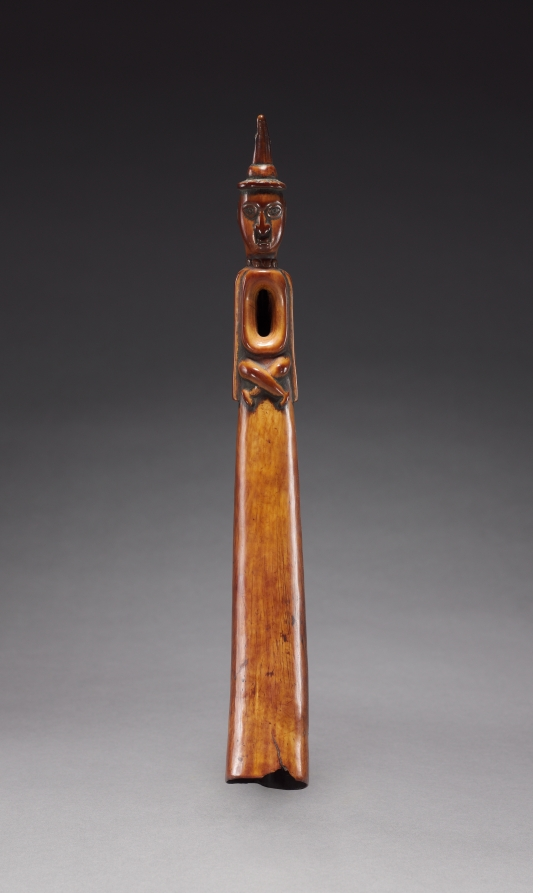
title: Oliphant (Side-Blown Trumpet)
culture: Africa, Central Africa, Democratic Republic of Congo (most likely), Cabinda, or Republic of the Congo, probably Yombe-style maker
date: late 1800s–early 1900s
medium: Ivory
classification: Musical Instrument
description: Side-blown trumpets were used on various occasions, and ivory examples seem to have been reserved for more solemn circumstances, such as funerals. As the mouthpiece is located on the inner curve, the person who played this instrument held it horizontally. A seated male Yombe ruler wearing a shell necklace and a European-style cloak and hat is carved on top. His blended dress shows how Yombe people (a Kongo sub-group) selectively adopted elements of foreign dress to wear with their own fashions.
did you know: Kongo Kingdom rulers sent ornately carved large side-blown trumpets to Europe as diplomatic gifts during the sixteenth century.